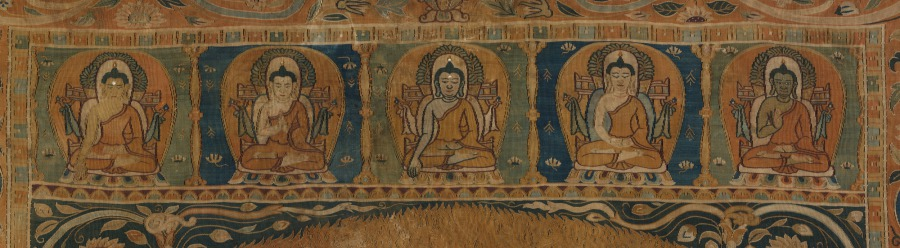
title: Achala, King of the Wrathful Ones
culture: China, Zhejiang Province, probably Hangzhou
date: early 1200s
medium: Thangka, silk tapestry with pearls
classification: Textile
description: The powerful blue body of Achala, meaning “immovable,” dominates the composition. He holds a sword to cut through ignorance and a noose for catching illusions that plague the path to enlightenment. Small personifications of furious destroyers of illusion (maya) emanate from him on either side, each with his own weapon. This image expresses what advanced practitioners would visualize in meditation rituals, as explained in Buddhist texts called tantras. Woven with a sophistication matched only by products of the Hangzhou looms, this devotional tapestry made its way to Khara-Khoto, capital of the Tangut Empire located in present-day Mongolia and Central Asia, where tantric Buddhism was prevalent.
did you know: The elephant-headed figure under his left foot is a demonic divinity, a yaksha, who creates obstacles to enlightenment.